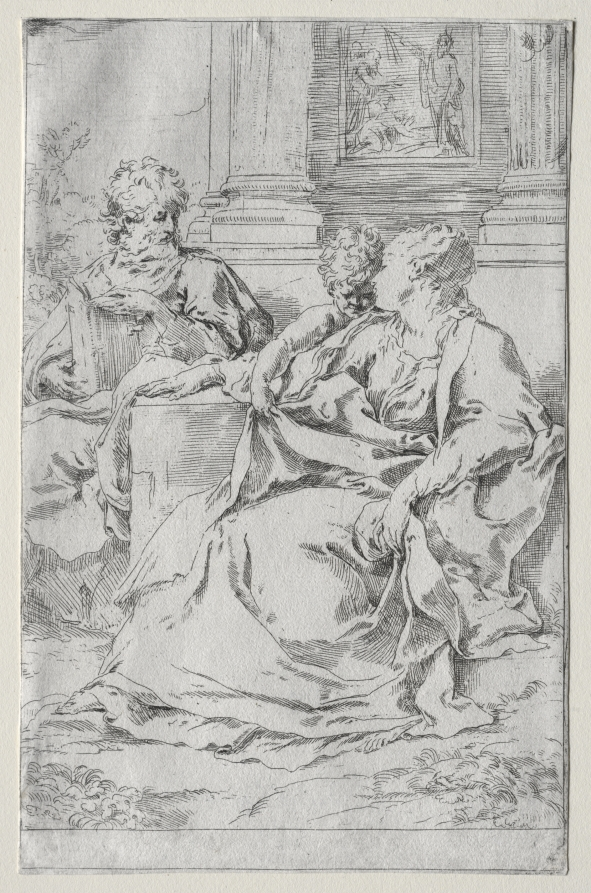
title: The Holy Family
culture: Italy, 17th century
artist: Guido Reni (Italian, 1575–1642)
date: c. 1590–1610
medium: etching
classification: Print